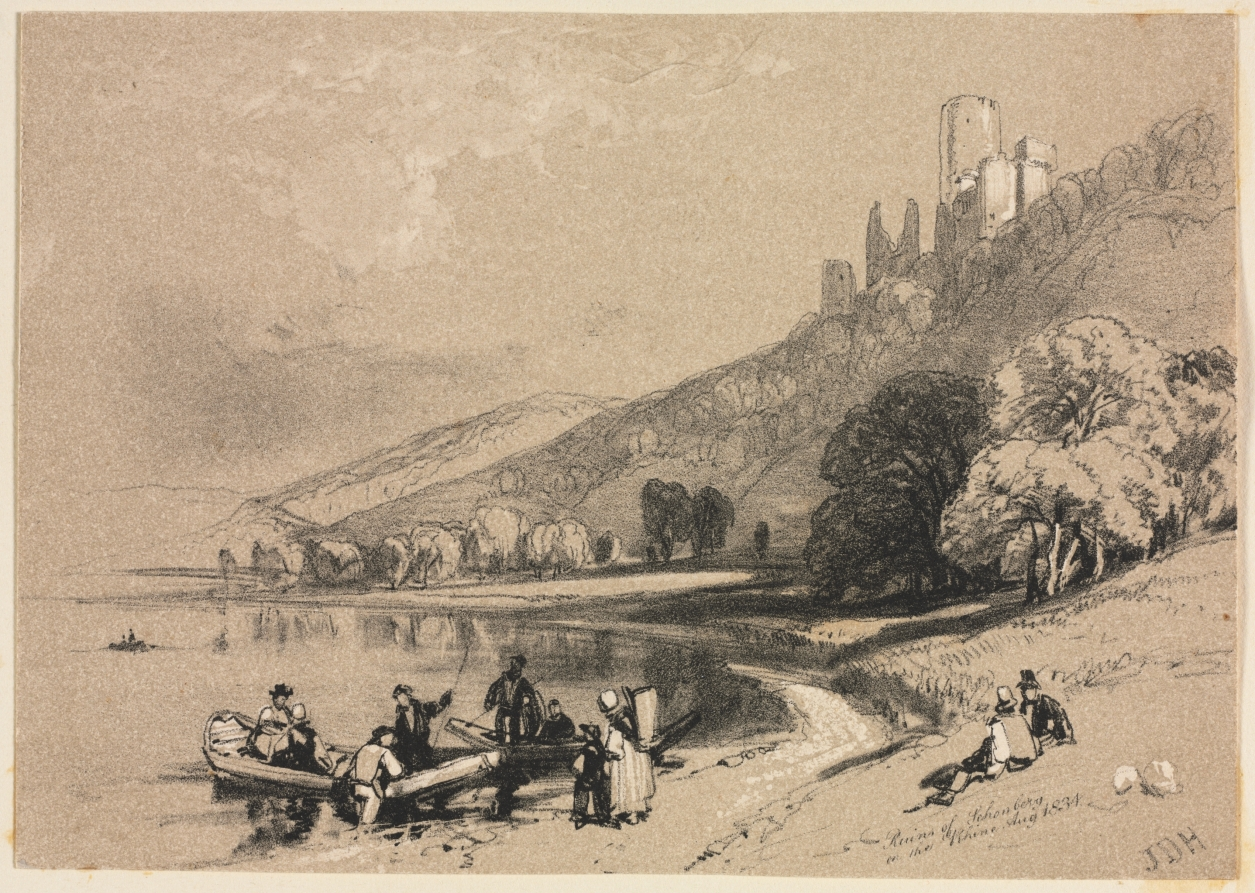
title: Sketches at Home and Abroad: Ruins of Schonberg on the Rhine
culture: England, 19th century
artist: James Duffield Harding (British, 1798–1863)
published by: Charles Tilt, Fleet Street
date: 1834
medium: lithograph in black and gray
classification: Print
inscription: signed with initials, lower right in stone: "J.D.H"